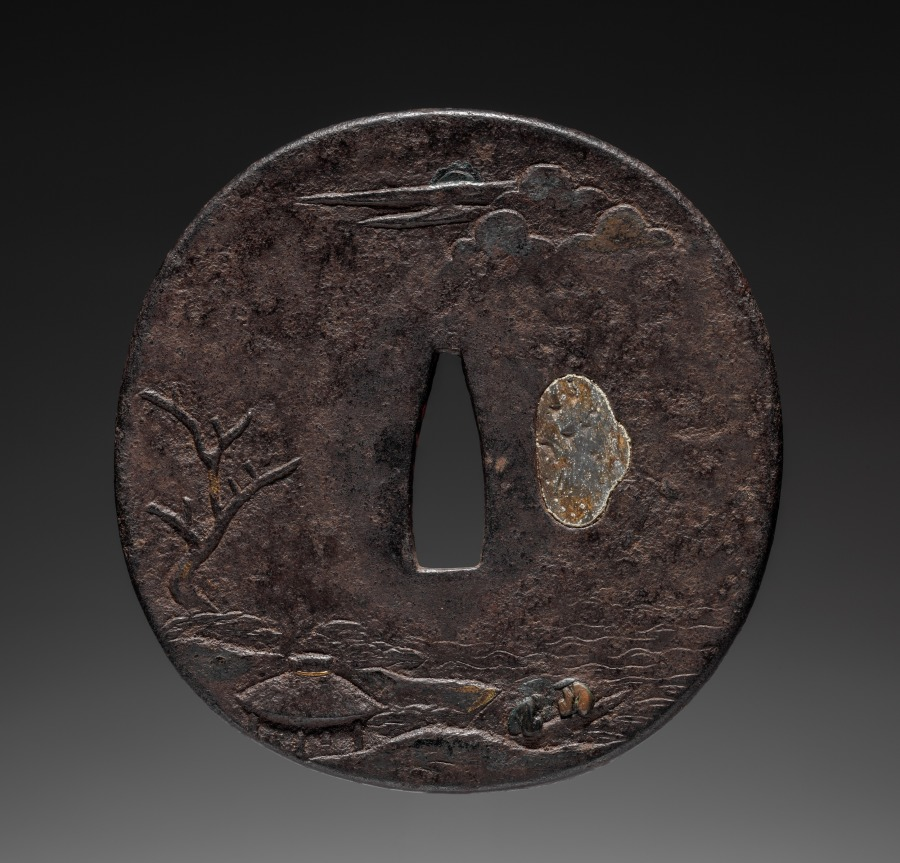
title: Sword Guard (Tsuba) with Chinese Landscape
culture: Japan, possibly Edo period (1615-1868)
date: c. 1615–1868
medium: iron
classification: Arms and Armor